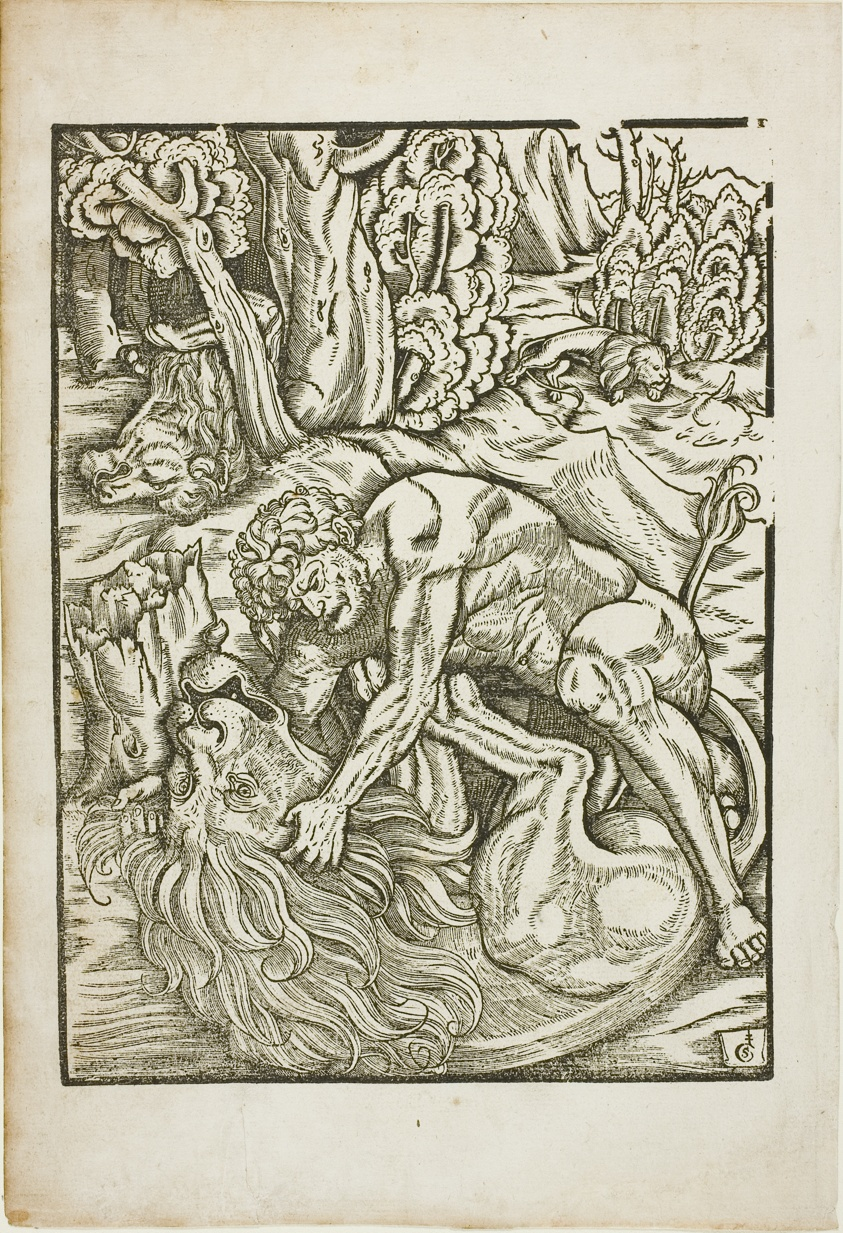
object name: Print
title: Hercules Strangling the Nemean Lion, from the Labors of Hercules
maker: Gabriel Salmon (French, active 1504-1542)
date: c. 1528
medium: Woodcut on paper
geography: France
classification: woodcut; print; prints and drawing